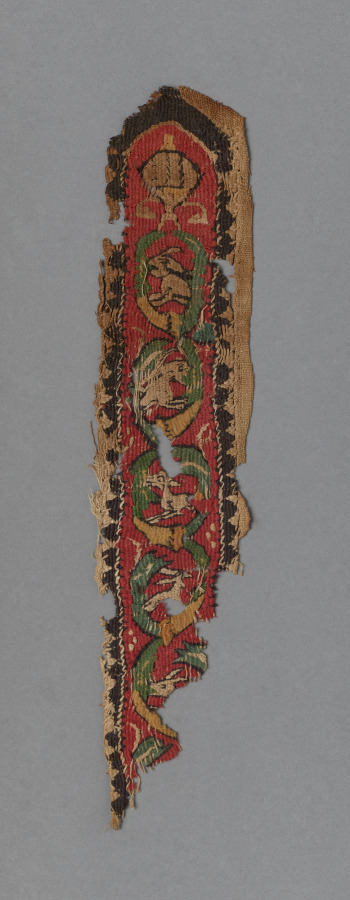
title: Fragment from a Tunic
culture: Egypt, 6th - 16th century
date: 500s - 1500s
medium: tabby weave with inwoven tapestry ornament, linen and wool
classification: Textile